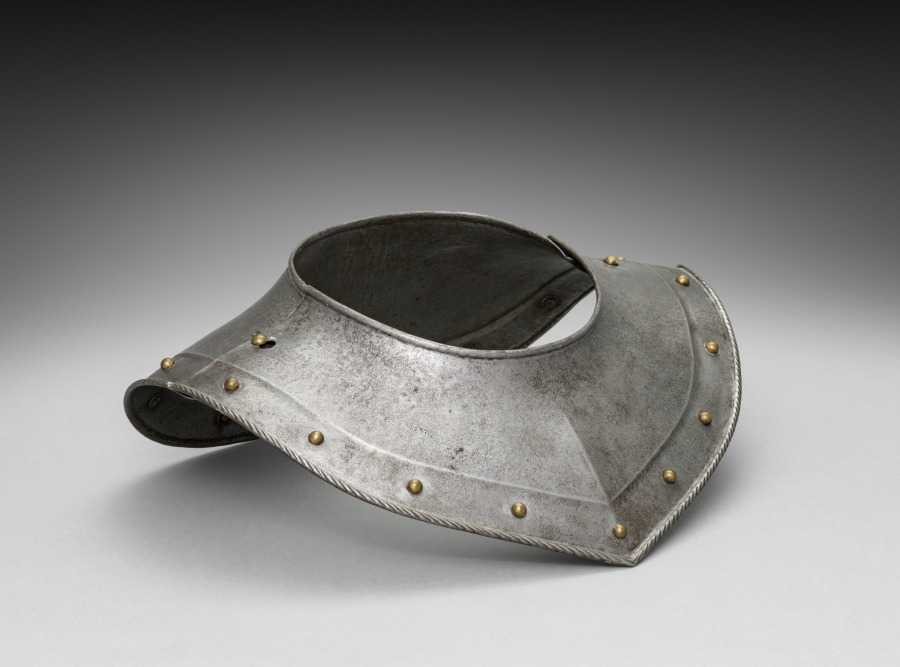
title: Colletin (two pieces)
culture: Germany, 19th century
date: 1801–1900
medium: steel with black paint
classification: Arms and Armor